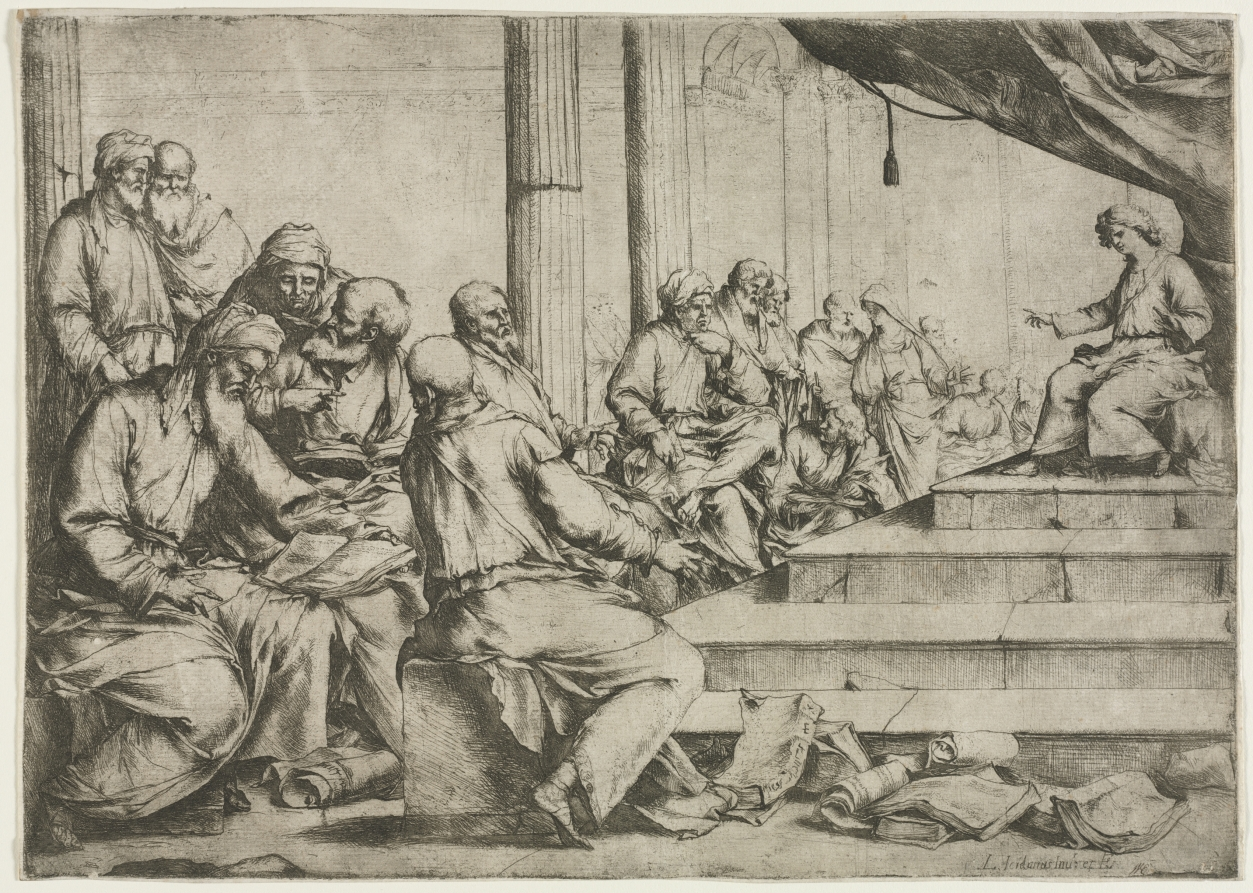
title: The Young Christ Teaching in the Temple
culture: Italy, 17th century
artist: Luca Giordano (Italian, 1634–1705)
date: c. 1653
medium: etching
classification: Print